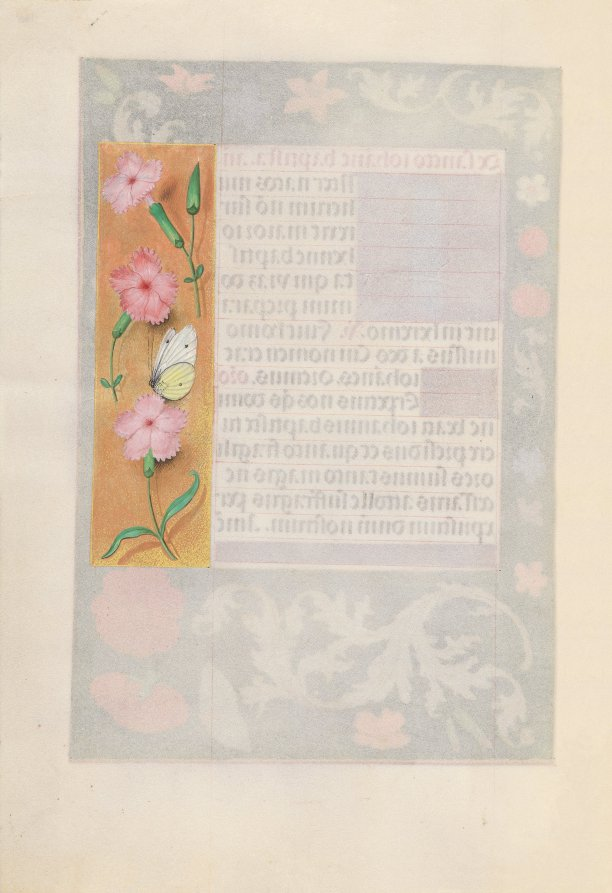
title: Hours of Queen Isabella the Catholic, Queen of Spain: Fol. 170v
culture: Flanders, Ghent and Bruges, late 15th century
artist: Master of the First Prayerbook of Maximillian (Flemish, c. 1444–1519)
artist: and Associates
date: c. 1500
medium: ink, tempera, and gold on vellum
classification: Bound Volume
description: This manuscript was illuminated by a circle of at least five highly organized manuscript painters active in the Flemish cities of Ghent and Bruges. The principal illuminator was Alexander Bening, who painted the majority of the book's miniatures. Manuscripts produced by this circle of artists are renowned for the decoration of their borders, which typically feature a rich variety of realistically-painted flowers, birds, and butterflies. This prayer book, called a book of hours, was intended not for a cleric, but for the private devotions of a lay person-in this case, Isabella the Catholic, Queen of Spain (1451-1504). Isabella's coat of arms embellishes the book's frontispiece. It is unlikely that the book was commissioned by the Queen herself; rather, she probably received it as a diplomatic gift from someone courting her patronage, perhaps Cardinal Francisco Jimenez de Cisneros. A Franciscan friar, Jimenez was dependent upon Isabella for his advancement, first to the post of Queen's confessor in 1492, and then to Archbishop of Toledo in 1495.